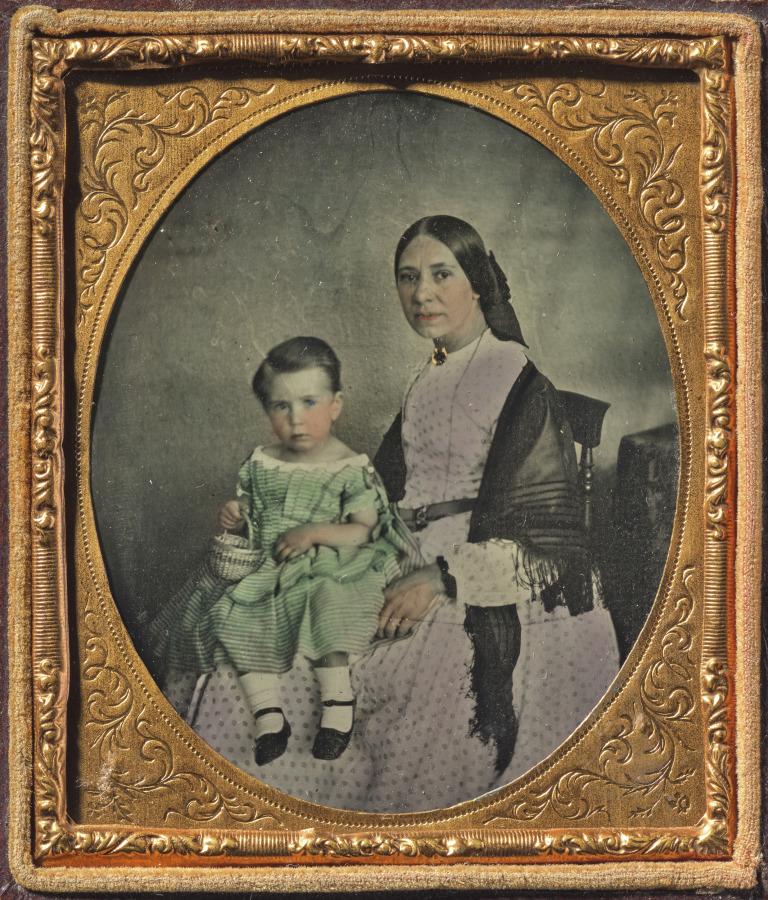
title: Mother and Child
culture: America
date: c. 1865–70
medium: ambrotype, tinted, sixth plate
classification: Photograph